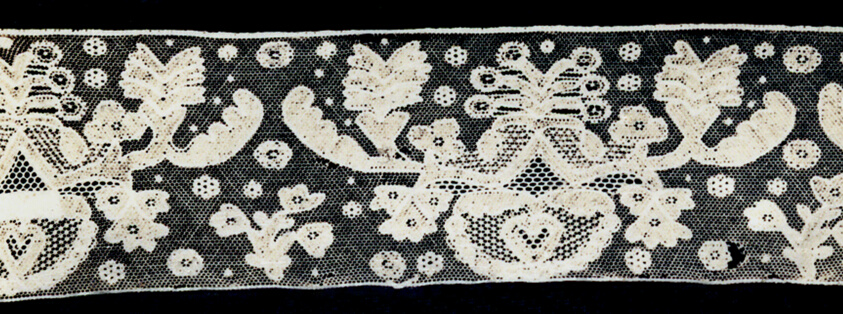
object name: Textile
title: Border (Fragment)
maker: Belgium or France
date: 1850/1900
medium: Cotton, machine-made twist net; embroidered in back, buttonhole, chain (tambour work), cross, darning, and overcast stitches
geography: Belgium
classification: textile; lace - mixed